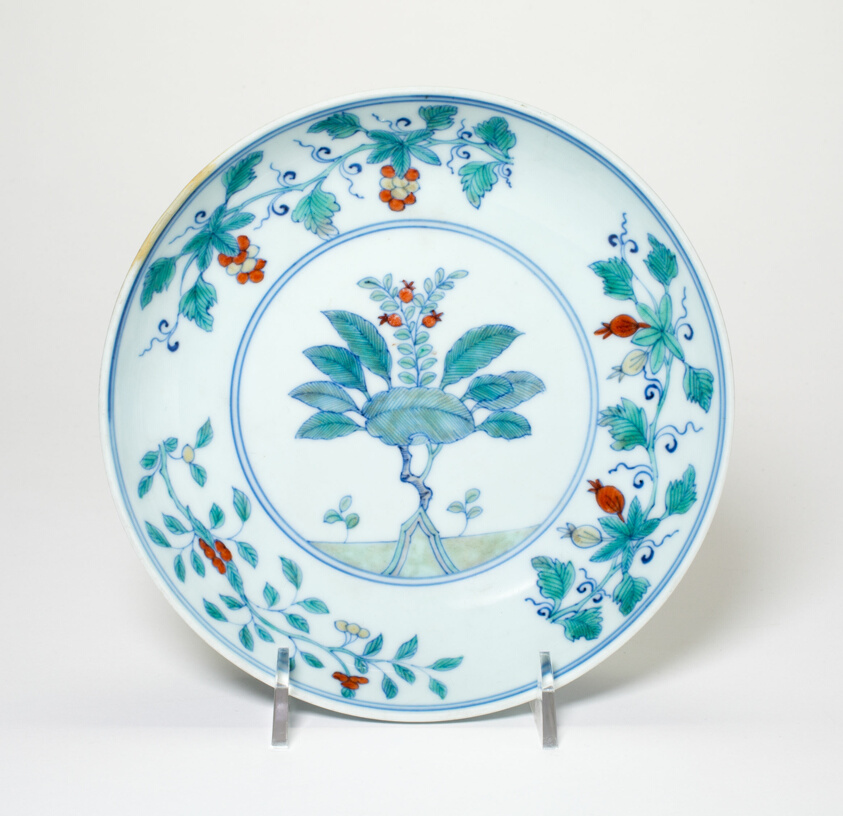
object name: Vessel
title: Dish with Grape, Cherry, and Pomegrenate Stems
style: Chinese (culture or style)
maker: China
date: Qing dynasty (1644–1911), c. 18th century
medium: Porcelain painted in underglaze blue and red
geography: China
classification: dish (vessel); porcelain; asian art; ceramics; vessel